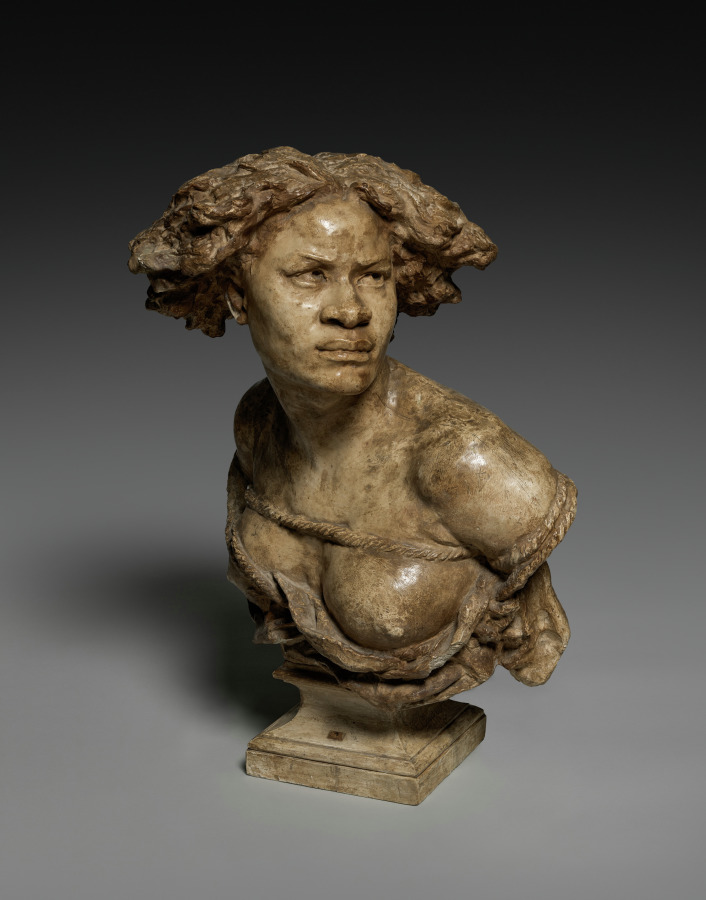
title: Why Born Enslaved!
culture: France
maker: Jean-Baptiste Carpeaux (French, 1827–1875)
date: 1867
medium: Plaster, original polychromed surface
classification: Sculpture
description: One of the most powerful expressions of abolitionist sentiment in the visual arts, Why Born Enslaved! depicts an African woman bound by ropes and looking defiantly upward. The ropes press painfully into her breasts; her torn blouse alludes to the violence responsible for her condition. The original, polychromed surface is covered with complex, nuanced hatchings and subtle modeling. Evidence indicates that this masterpiece of 19th-century French sculpture served as the master model for numerous casts in other museum collections.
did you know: Although officially abolished in France since 1848, slavery remained a hotly contested issue in Carpeaux’s time as it remained legal or tolerated in various countries around the world.